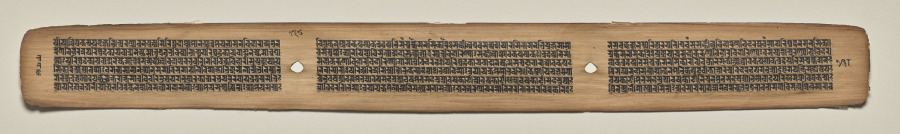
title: Text, Folio 138 (verso), from a Manuscript of the Perfection of Wisdom in Eight Thousand Lines (Ashtasahasrika Prajnaparamita-sutra)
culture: Eastern India, Bihar, Vikramashila Monastery. Painting: Nepal, Kathmandu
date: Sunday, September 14, 1119 (year 239 of the Newar Samvat in the month of Ashvina)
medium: gum tempera and ink on palm leaves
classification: Painting